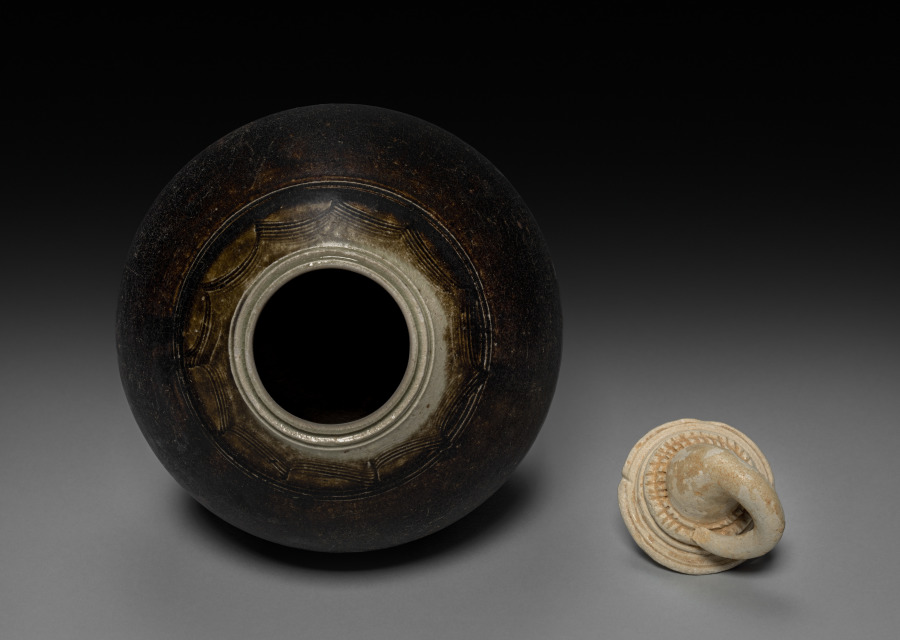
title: Jar in the Shape of a Fruit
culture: Cambodia, Northeast Thai kiln, Khmer Ware, Angkor Wat/Bayon period, 12th century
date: 1100s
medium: glazed pottery with brown slip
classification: Ceramic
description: This dark-brown glazed jar, with the heavy clay body and translucent glaze on the cover and the top just below it, has a rare shape of a fruit. It has a narrow foot with several moldings and incised wavy pattern immediately below the cover which is shaped in the form of a curling fruit stem that forms a handle. It is difficult to determine what type of fruit was meant, possibly a squash.